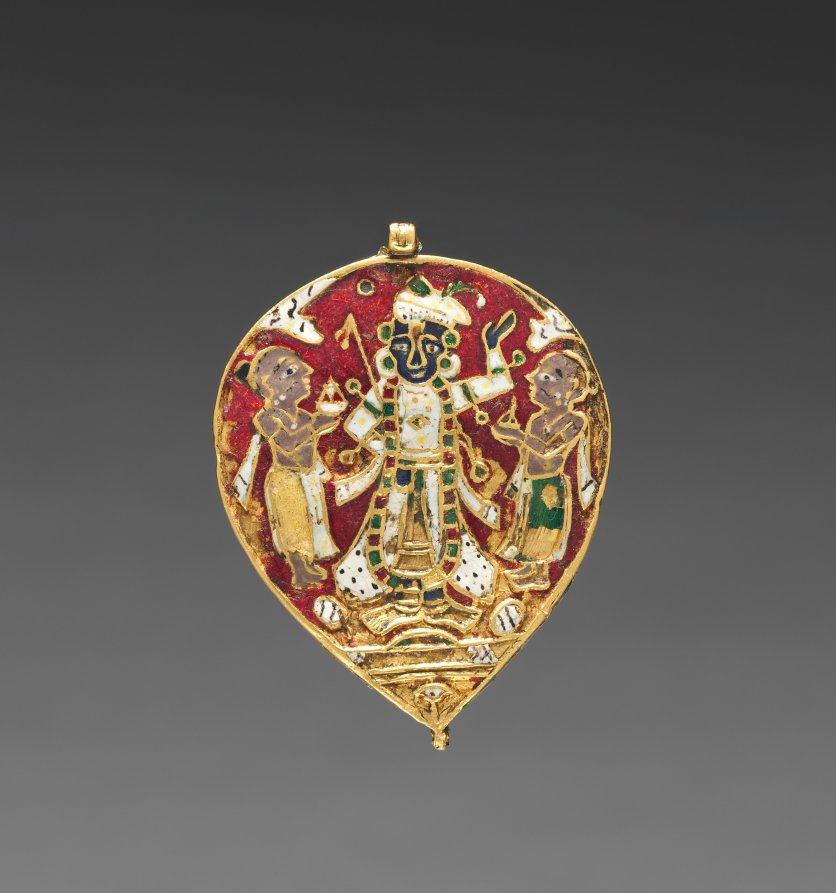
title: Pendant: Krishna as Shri Nathji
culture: Northwestern India, Rajasthan, Nathdwara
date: c. 1800–1830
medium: champlevé enamel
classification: Jewelry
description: Diminutive images of Krishna as Shri Nathji were worn by devotees, sometimes secretly in times of persecution. Even in the tiny composition, Krishna’s raised left hand can be seen clearly, referencing his miraculous lifting of Mount Govardhan. In his right arm he holds his herdsman’s staff. Two priests offer lamps in his honor.